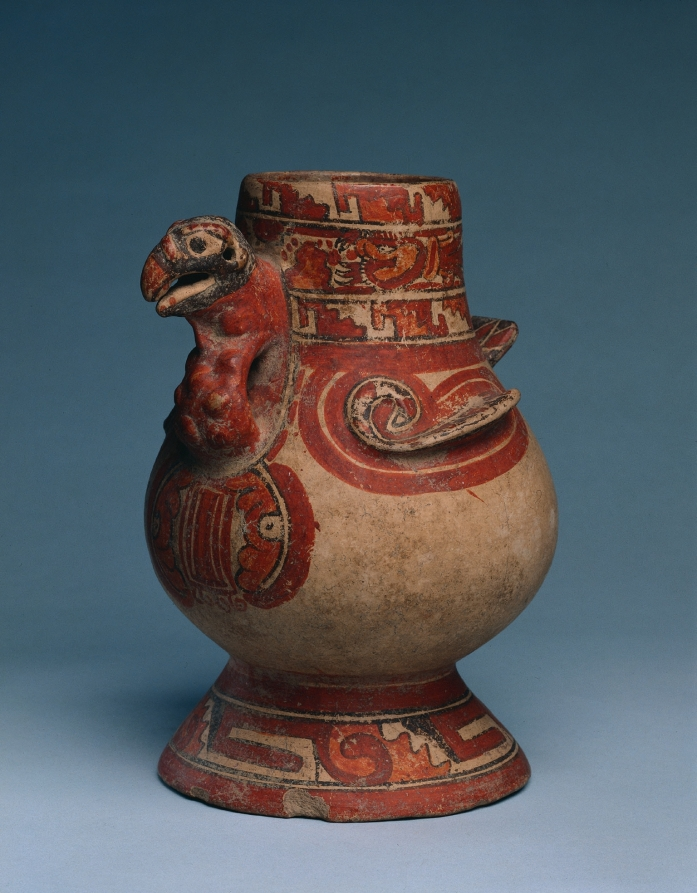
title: Turkey Vessel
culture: Costa Rica, Southern Nicoya region, Pataky Polychrome style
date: c. 1000–1550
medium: ceramic, slip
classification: Ceramic